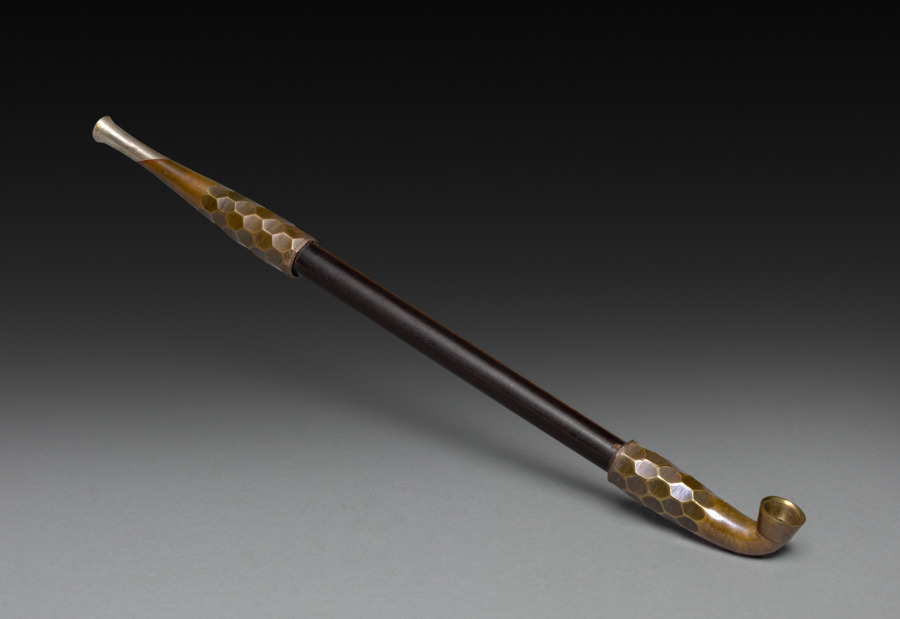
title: Tobacco Pipe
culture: Japan, Edo period (1615–1868)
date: early to mid-1800s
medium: wood and brass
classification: Miscellaneous